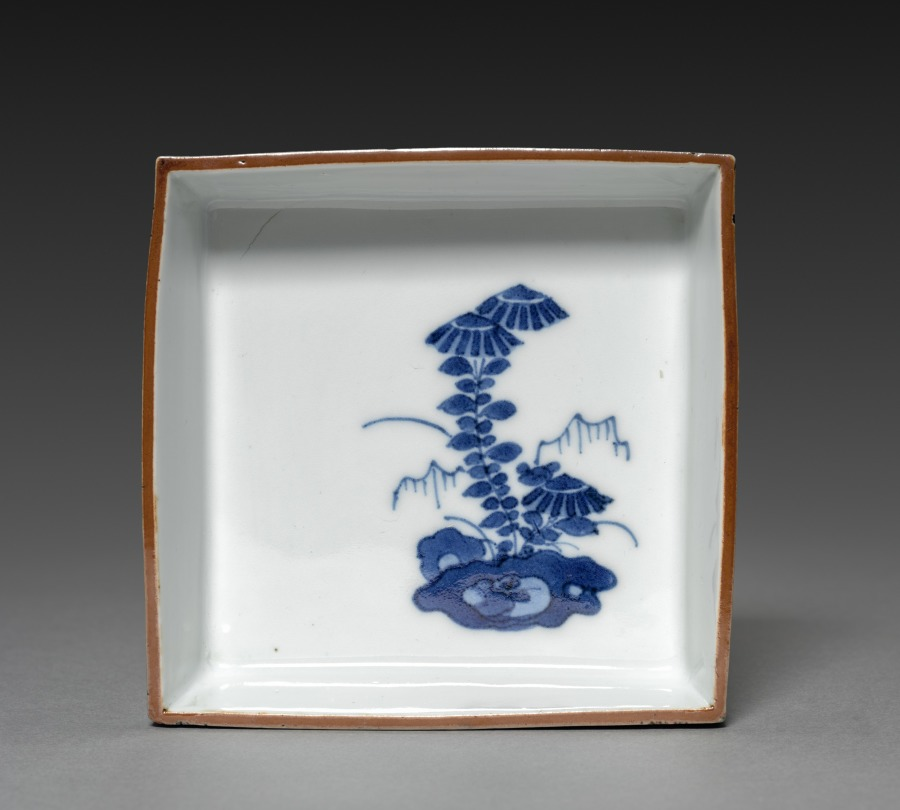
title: Side-Dish with Dandelion in Rocks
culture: Japan, Edo period (1615–1868)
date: 1700s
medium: One of a set of five dishes; porcelain with underglaze blue and overglaze iron oxide (Arita ware, Kutani style)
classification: Ceramic